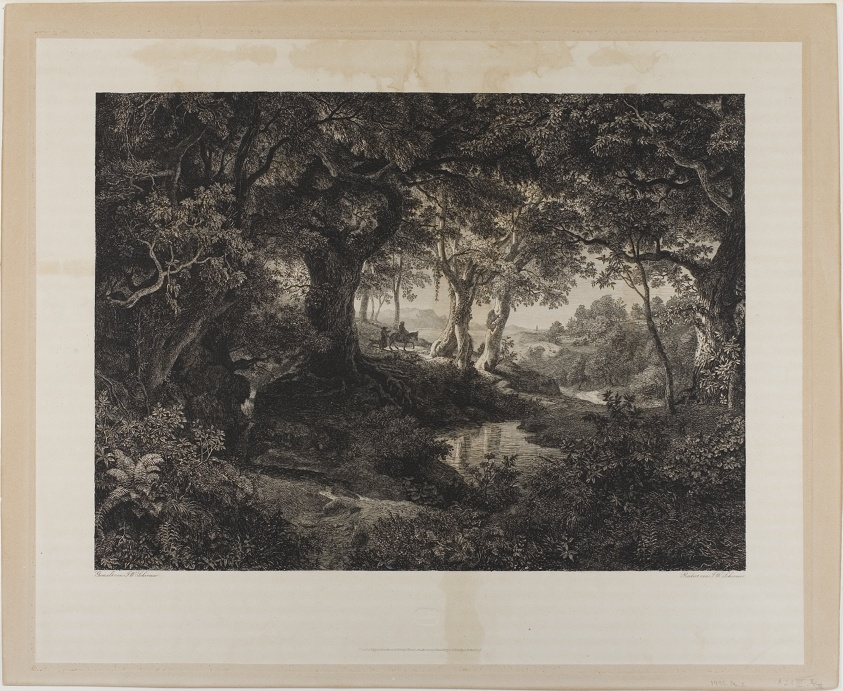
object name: Print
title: The Large Italian Landscape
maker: Johann Wilhelm Schirmer (German, 1807-1863)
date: 1841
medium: Etching on ivory chine, laid down on buff wove paper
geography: Germany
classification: etching; print; prints and drawing